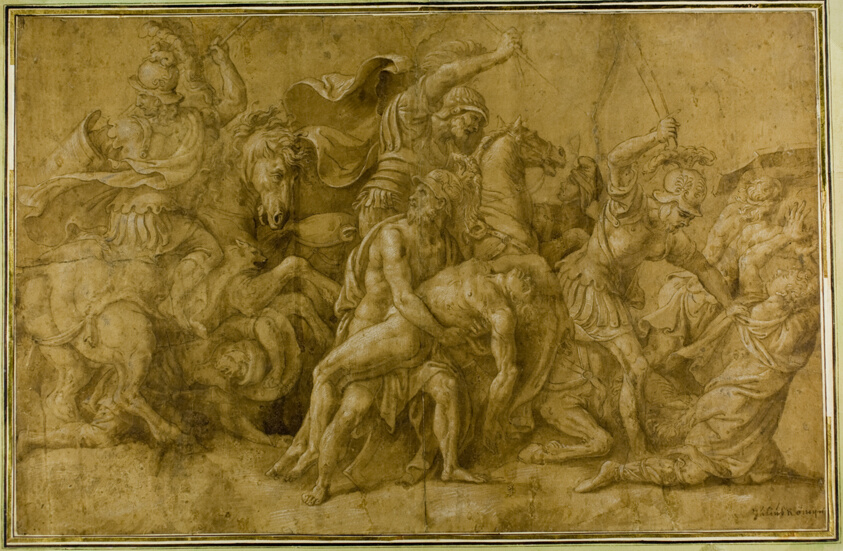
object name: Drawing and Watercolor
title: Menelaus Holding the Body of Patroclus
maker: after Giulio Pippi, called Giulio Romano; Italian, c. 1499-1546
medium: Pen and brown ink, with brush and brown wash, heightened with white gouache, on tan laid paper, laid down on card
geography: Italy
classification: ink with wash; drawings (visual works); prints and drawing